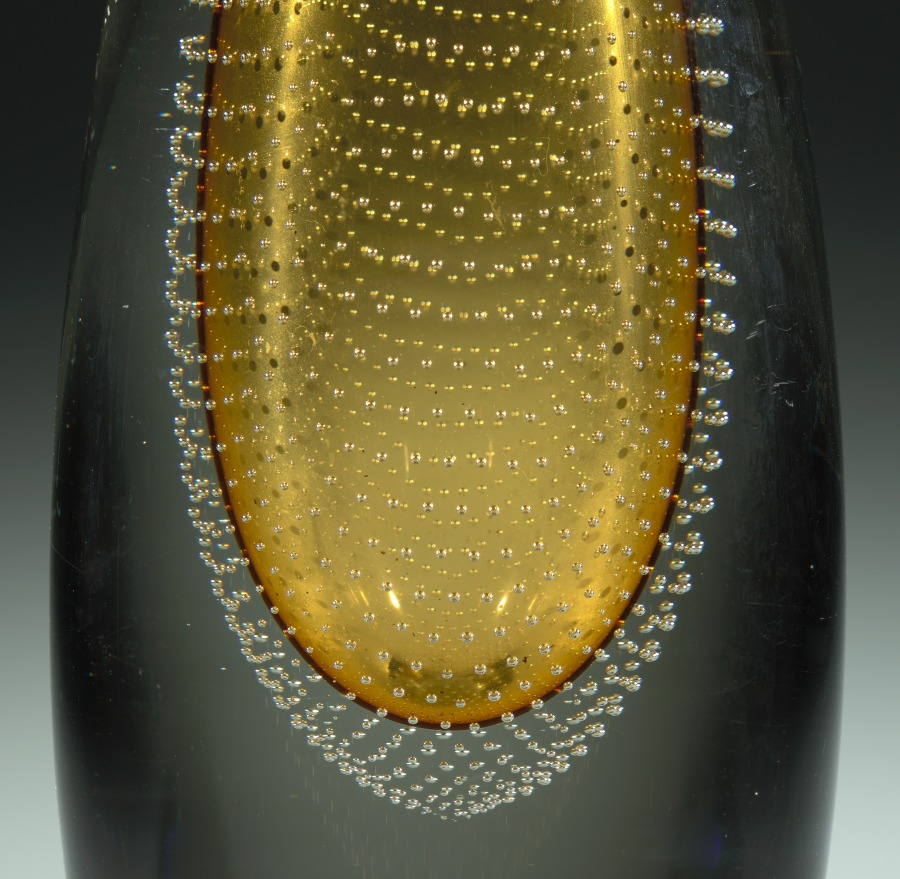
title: Vase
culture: Finland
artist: Gunnel Nyman (Finnish, 1909–1948)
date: 1950s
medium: glass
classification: Glass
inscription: inscribed on bottom: NYMAN/NUUTAJARVI/NOTSJO-(3?)(9?).